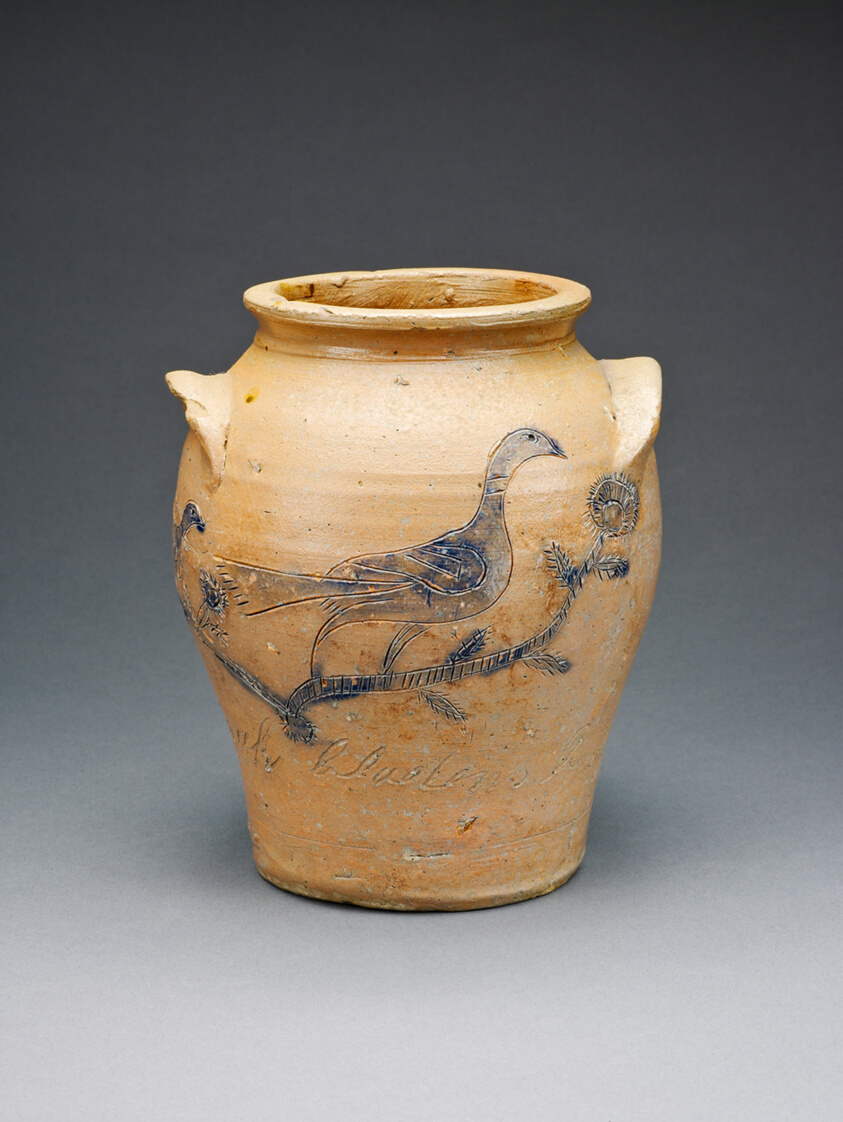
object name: Ceramics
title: Saleratus Jar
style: Folk Art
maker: George Muk; American, c. 1813–after 1850; Bladensburg, Maryland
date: 1848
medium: Stoneware and salt glaze with cobalt oxide glaze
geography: Bladensburg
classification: vessel; american decorative arts; american arts; ceramics; decorative arts